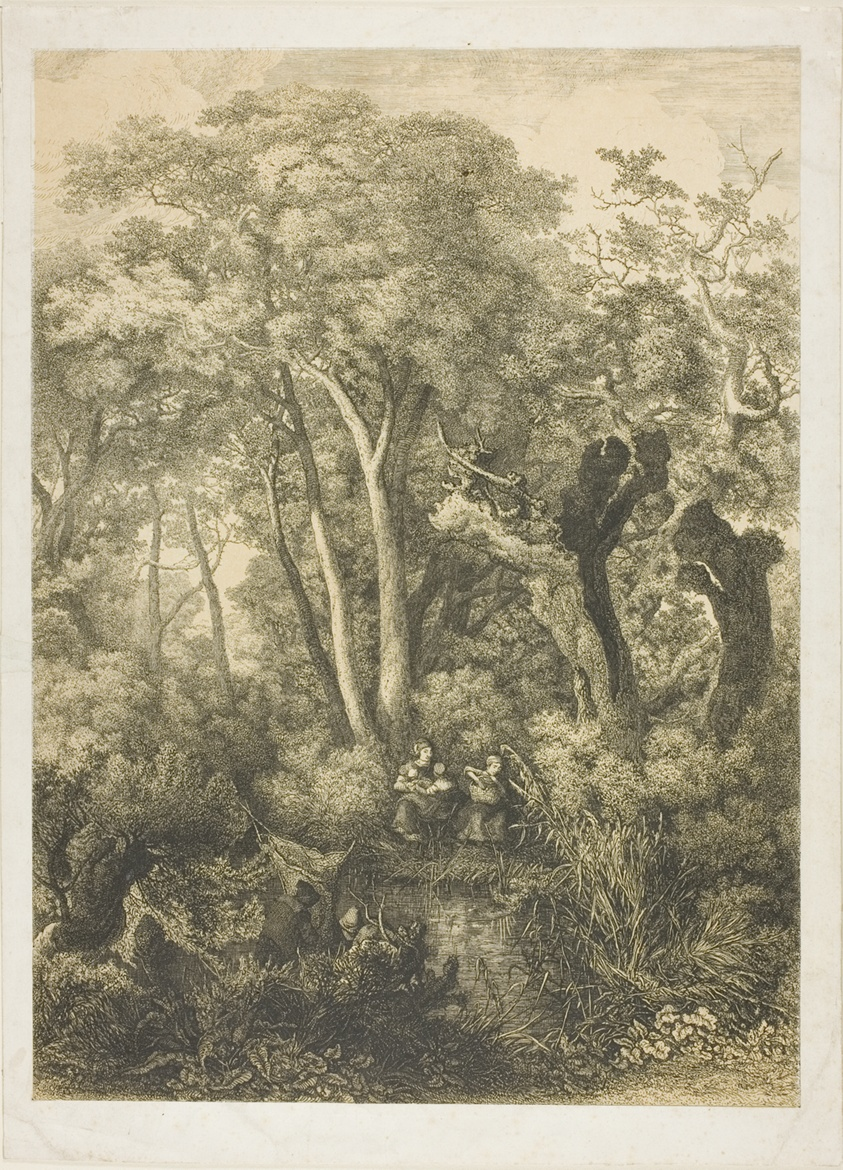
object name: Print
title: Fishing Family at the Edge of a Stream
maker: Charles-André Malardot (French, 1817-1879)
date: 1860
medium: Etching, over fawn lithotint, with roulette, on ivory wove paper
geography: France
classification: etching; print; prints and drawing